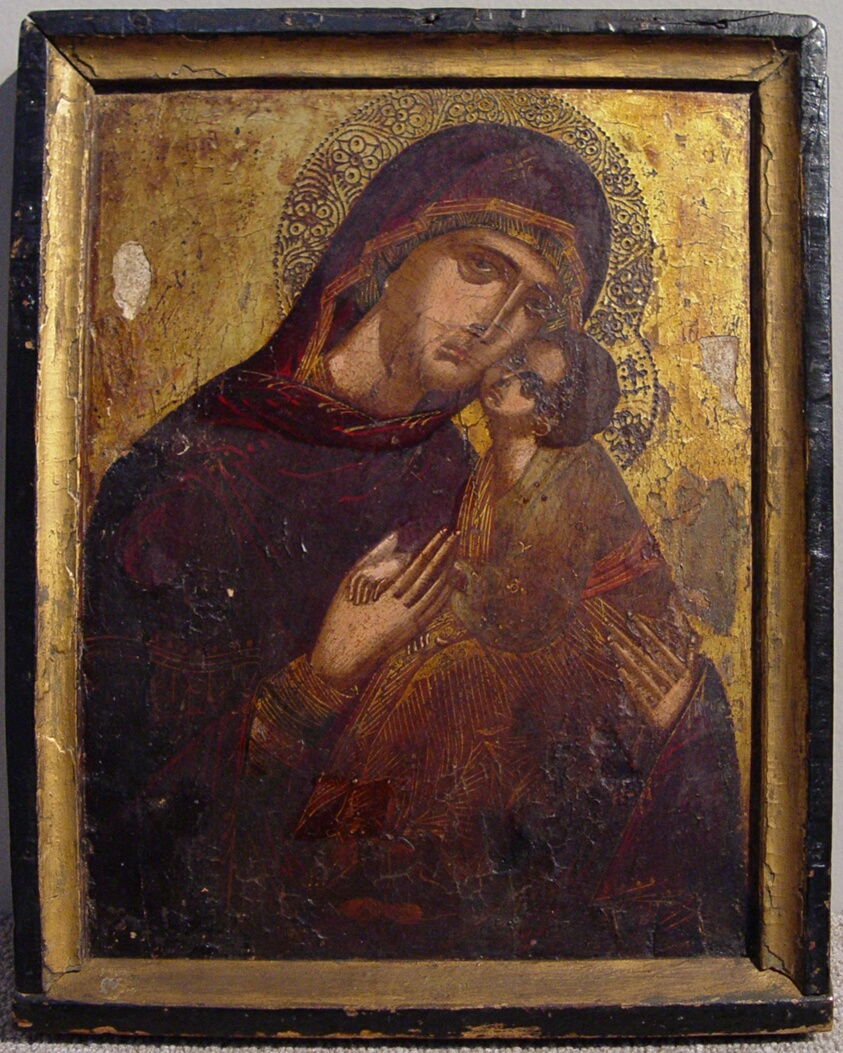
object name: Painting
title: Icon with the Virgin and Child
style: ancient, 16th Century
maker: Greek; Cretan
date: c. 1500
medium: Tempera on panel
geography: Kríti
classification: tempera; paint; painting; european painting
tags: Virgin and child/Madonna and child, biblical, Christian subjects, Christianity, gold (color), Jesus, religion, religious, Virgin Mary, woman, woman with children, children, goddesses, gods (deities)